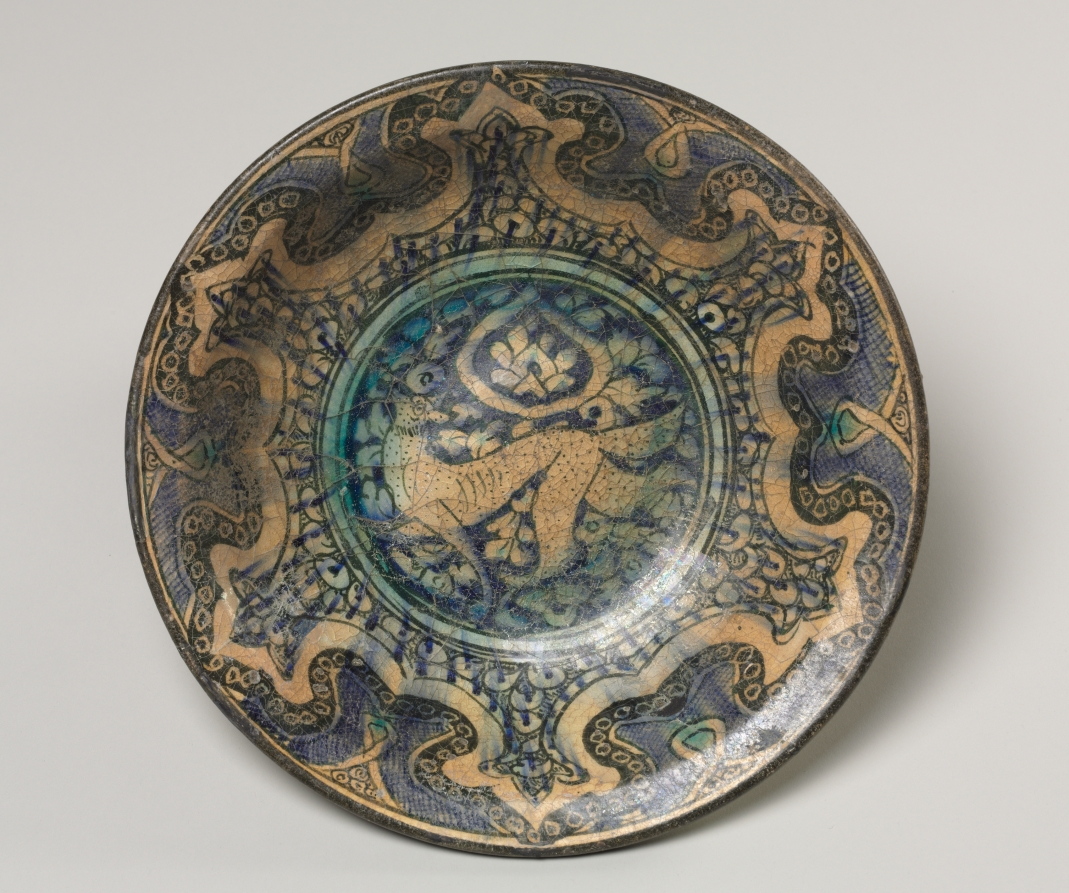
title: Bowl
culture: Iran, probably Sultanabad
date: 1300–1350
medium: fritware with underglaze-painted design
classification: Ceramic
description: Sultanabad wares were the first new type of pottery made in Iran after the Mongol conquest. These underglaze painted wares are characterized by a somber color scheme of gray, black, and white. The name "Sultanabad" comes from the modern city near which they were first discovered. This type of pottery was widely exported, perhaps even imitated, for it has been excavated over a vast area from central Asia to Egypt.